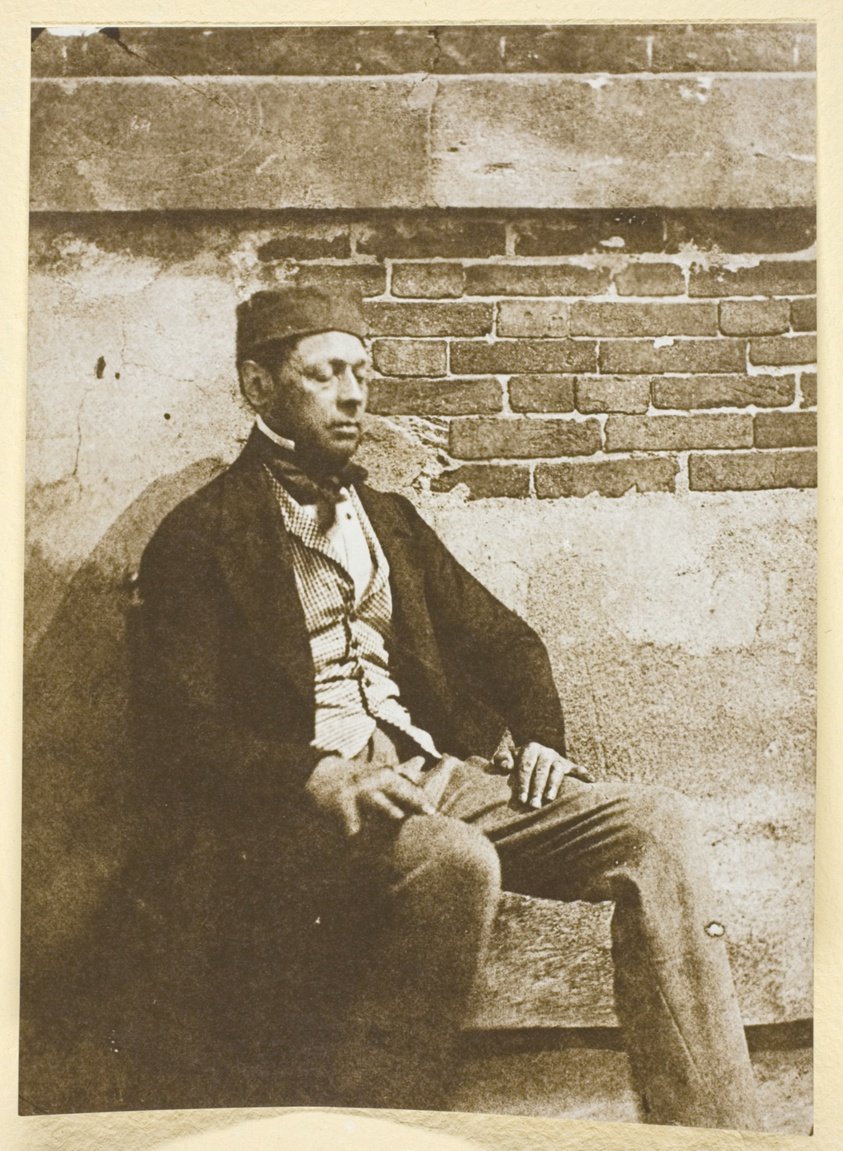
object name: Photograph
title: Bayard, les yeux Fermès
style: 19th century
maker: Hippolyte Bayard (French, 1801–1887)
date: 1842/50, printed 1965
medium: Gelatin silver print, No. 1 from the portfolio "Bayard: XXV Calotypes, 1842-1850" (1965)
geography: France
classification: photographic process; photography; photograph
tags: Collected by Hugh Edwards